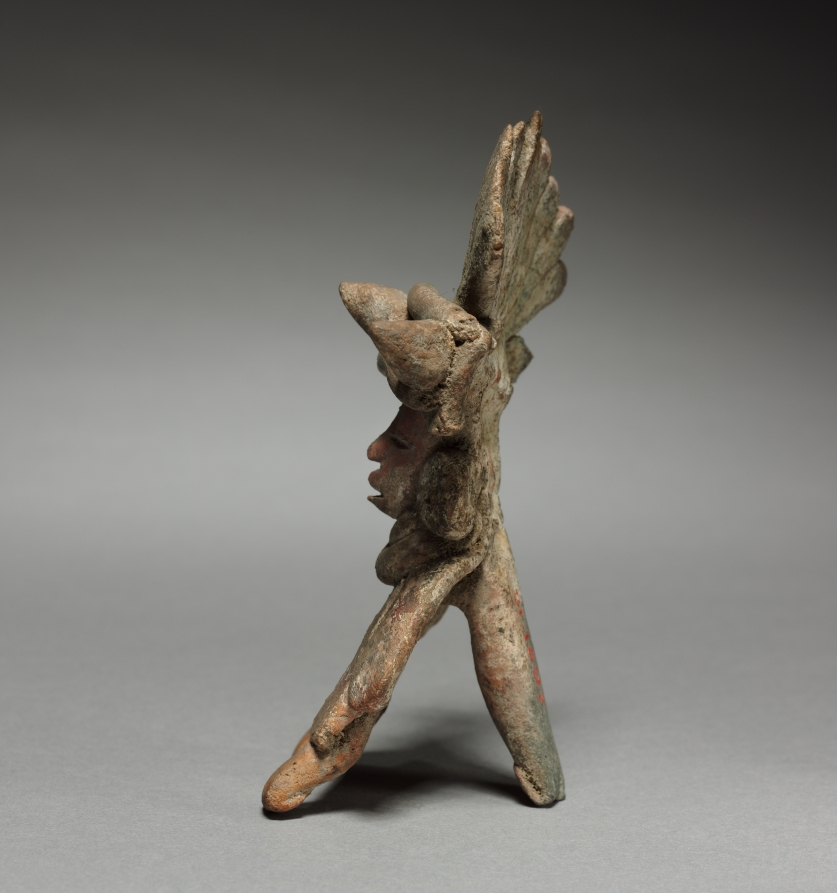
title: Figurine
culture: Mexico, Teotihuacan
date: 1–750 CE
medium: pottery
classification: Ceramic